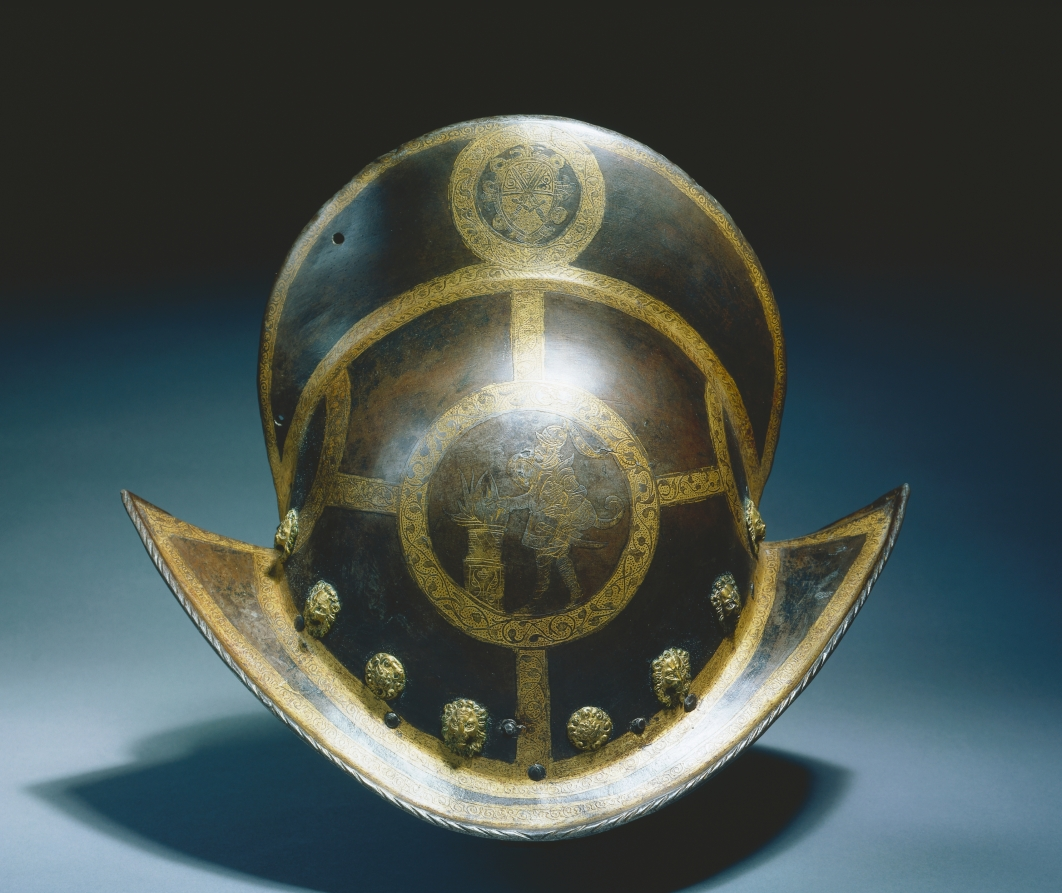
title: Morion of the State Guard of Elector Christian I of Saxony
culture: Germany, Nuremberg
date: c. 1580–91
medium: russet steel, etched and gilded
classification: Arms and Armor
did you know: Christian I of Saxony outfitted his palace guards with black and yellow outfits topped off with a coordinated helmet like this one to highlight his grandeur and refinement. The Saxon coat of arms is also proudly displayed on the crest of this helmet.